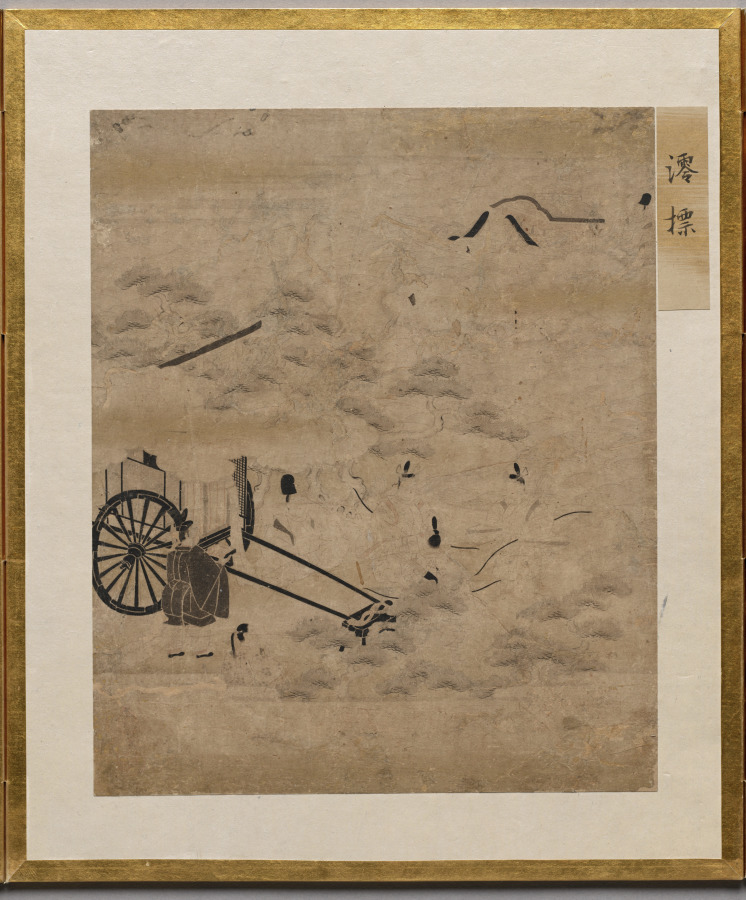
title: Channel Buoys from Album of Illustrations for the Tale of Genji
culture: Japan, Edo period (1615–1868)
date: 1600s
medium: painting in an accordion-style album; ink, light color, and gold on paper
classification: Bound Volume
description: This album contains illustrations for the classic literary work the Tale of Genji, authored in the 1000s by Murasaki Shikibu, an aristocrat of the Heian period (794–1185) court. The scenes are painted in the “white drawing” (hakubyō) mode, in which a fine ink line is used to depict figures and spaces with great subtlety, punctuated only occasionally by traces of red pigment for a character’s lips, a detail of a garment, or a decorative element. These two scenes illustrate episodes from the chapters “Thin Veil of Cloud” (Usugumo) and “Barrier Gate” (Sekiya).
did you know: The illustrations are identified by chapter title in cartouches to the upper right of the paintings.